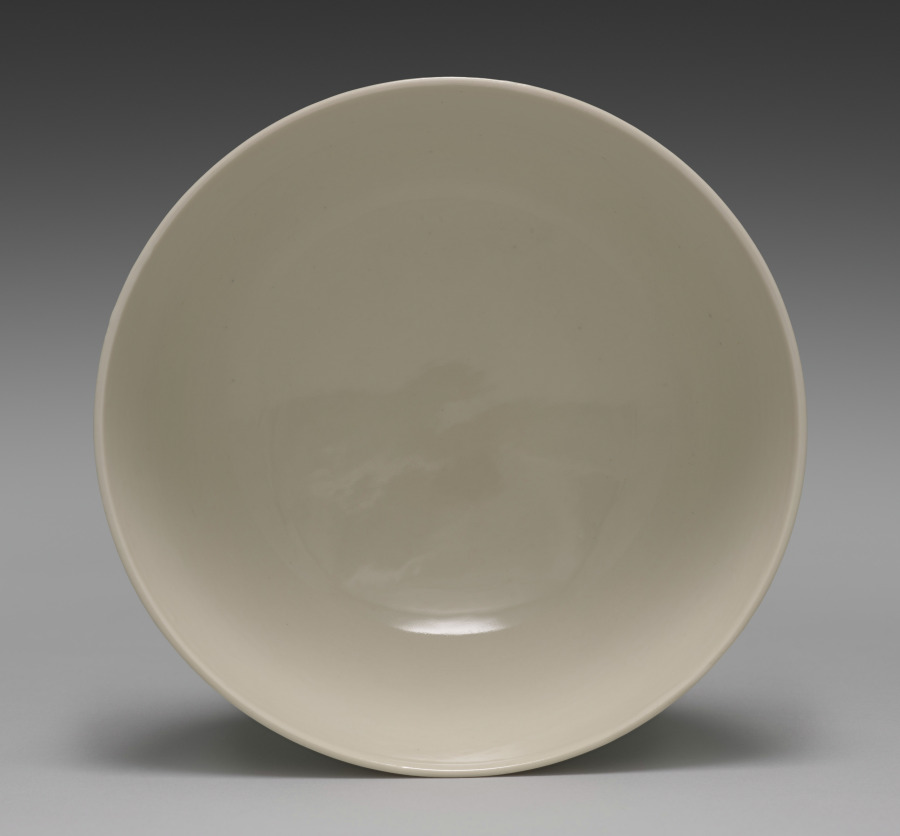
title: Bowl with Dragons Chasing Flaming Jewels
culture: Japan, Meiji period (1868–1912) to Taishō period (1912–26)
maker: Seifū Yohei III (Japanese, 1851–1914)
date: 1893–97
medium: Porcelain with molded and carved design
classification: Ceramic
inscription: 大日本清風造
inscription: 清風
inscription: 清風與平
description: The decoration of this large bowl, described as a donburi on one side of its box, is executed entirely in molded and carved relief under a creamy, pink-tinged translucent glaze. The main motif is a pair of four-clawed dragons pursuing flaming jewels. As is standard for this design, the beasts are surrounded by wisps of cloud, and a foliate pattern runs around the bottom of the basin. A geometric pattern circles the exterior of the footring. The white-on-white design makes the bowl subtle and elegant.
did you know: Kyoto-based Japanese ceramist Seifū Yohei III (1851–1914) admired the glaze colors found on Chinese porcelain and tried to replicate them through intensive experimentation.